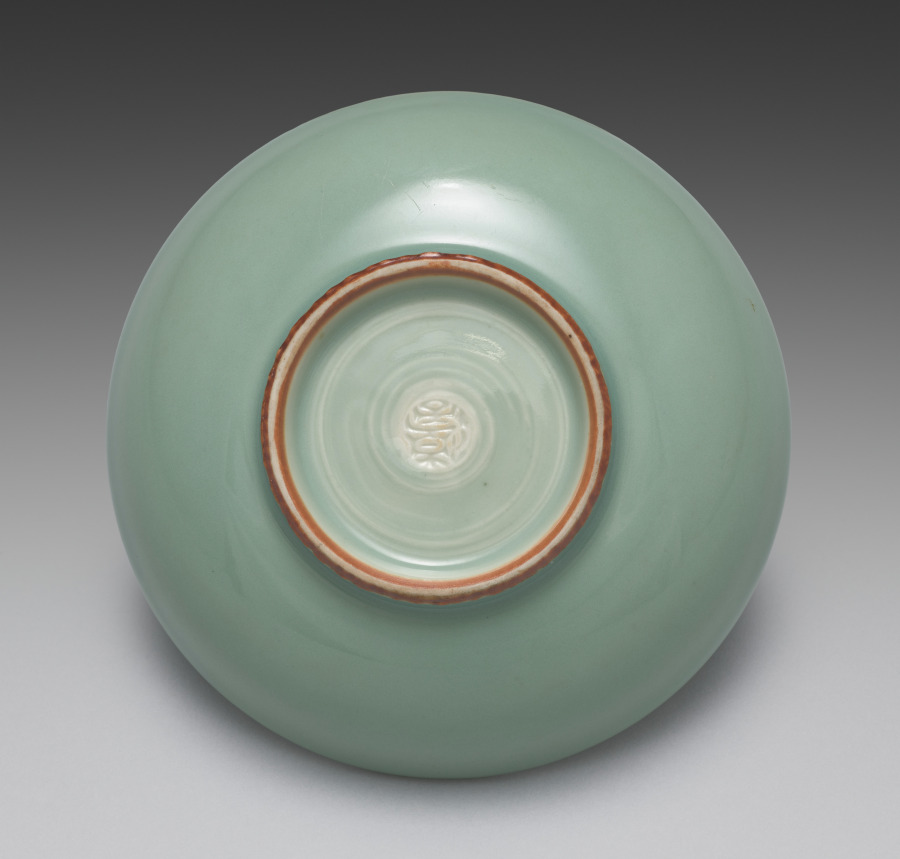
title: Dish from Dishes with Ivy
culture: Japan, Meiji period (1868–1912)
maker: Seifū Yohei III (Japanese, 1851–1914)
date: 1893–1914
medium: One from a set of five dishes; porcelain with green glaze and molded designs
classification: Ceramic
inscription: 清風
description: Yohei III’s main output for his sophisticated clientele was in the form of tea sets and dining sets. He often produced in pairs, sets of five, or sets of ten. This set of five dishes with a green glaze and designs of ivy vines in very low relief has unfortunately lost its box. These dishes are slightly larger than the other dishes, like CMA 2022.187, and so may have been not saucers but rather small plates for meals.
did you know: In his career, Seifū Yohei III created a range of dishes in green glazes.